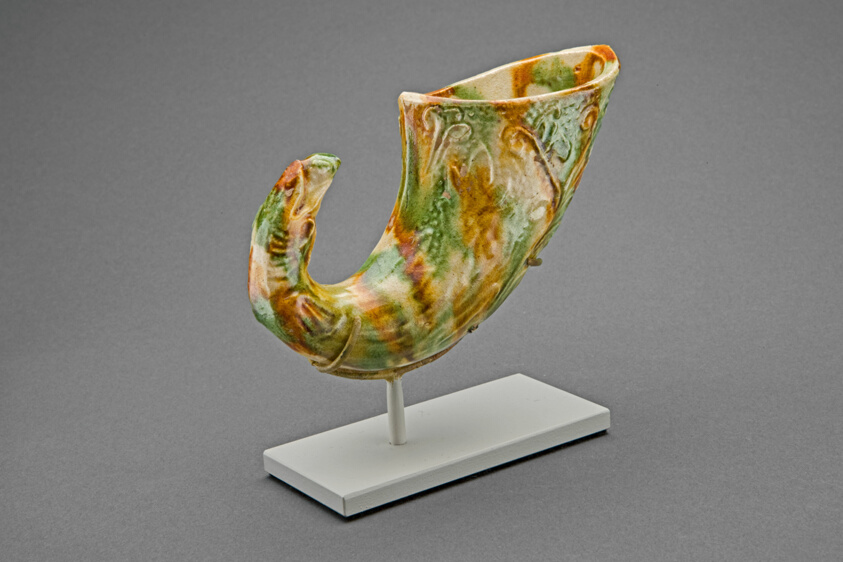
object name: Vessel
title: Bird-Head Rhyton Cup with Grape Clusters and Stemmed Scrolls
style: Chinese (culture or style)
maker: China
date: Tang dynasty (618–907), late 7th or early 8th century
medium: Earthenware with molded decoration and sancai (three-color) lead glazes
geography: China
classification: decorative arts